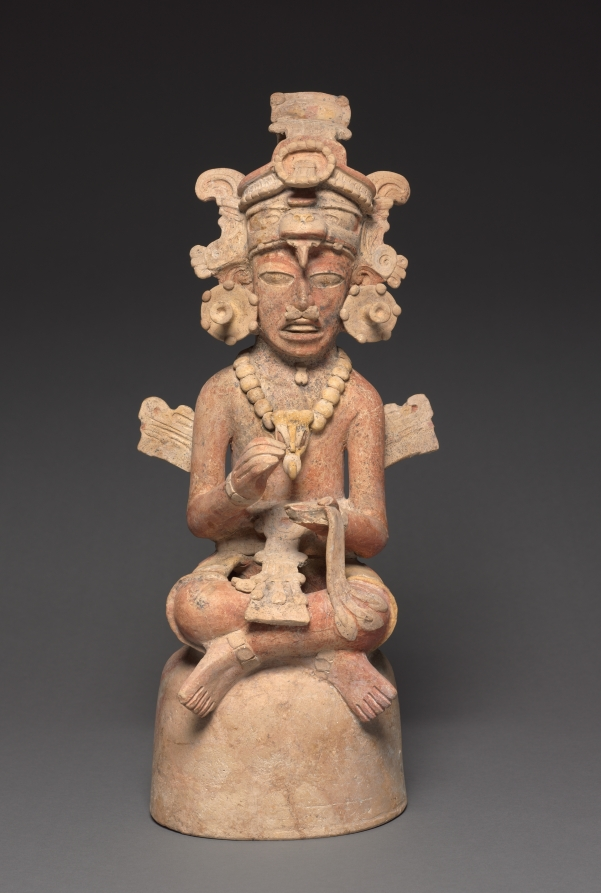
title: Artisan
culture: Guatemala, Petén region, Maya style (250-900), Maya style (250-900)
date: 250–600 CE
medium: earthenware with colored slips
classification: Sculpture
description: These figures represent the supernatural patrons of the visual arts and writing: the brothers Hun Batz and Hun Chuen ("One Monkey" and "One Artisan"). The two were refined artists but also bullies who tormented their younger brothers, who took revenge by transforming their elders into monkeys. Many Maya representations of the painter-scribes immortalize this fate by depicting the pair with both simian and human features, as here. The brothers are shown engaged in artistic or scribal pursuits. Sitting on high-domed bases that may have served as the lids of incense or offering bowls, each apparently once grasped a tool in his upper hand—for instance, a paint brush or a stylus for writing. In the lower hand, one cradles a small mask and the other, a piece of bark that likely refers to the beaten bark from which the Maya made books.